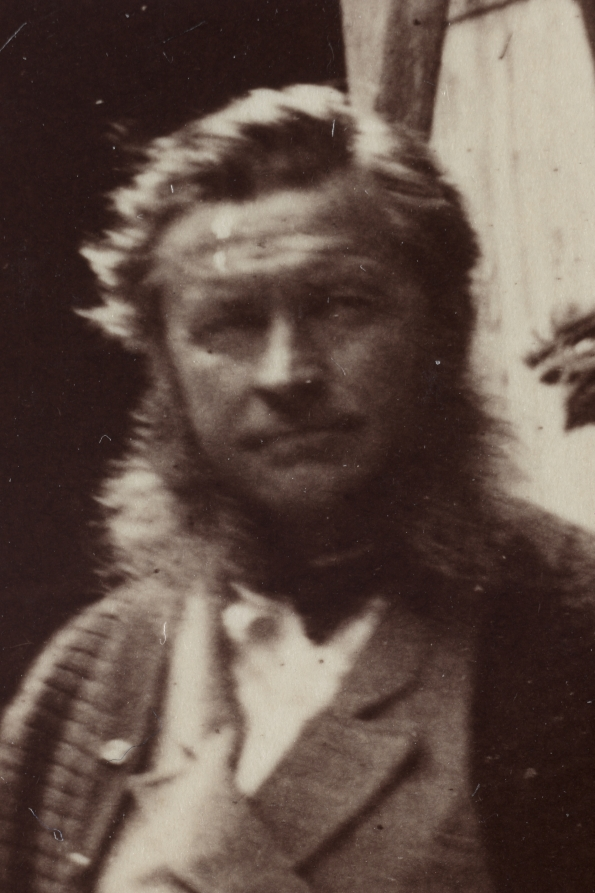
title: Courtyard with Painters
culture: France(?), 19th century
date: late 1860s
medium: albumen print from wet collodion negative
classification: Photograph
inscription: in pencil on reverse: Les Andeys (?) Cour & hotel, G713 and 695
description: This photographer inventively expanded the medium to create a rare example of both early genre (everyday life) photography and documentation of artists at work. The collodion negative captured a wealth of detail. The French village courtyard bustles with activity-the artist in the foreground hugs a squirming child and chats with his wife; a group of peasant women in the background heave huge bundles of laundry about in carts and baskets; and an innkeeper poses proudly for the camera outside his ivy-covered establishment. The diagonals of the sloping roofs and the textures of tiles, wood, and stone enhance the composition's visual interest. A luminous glow, absorbed by open canvas umbrellas, pervades the center of the scene.